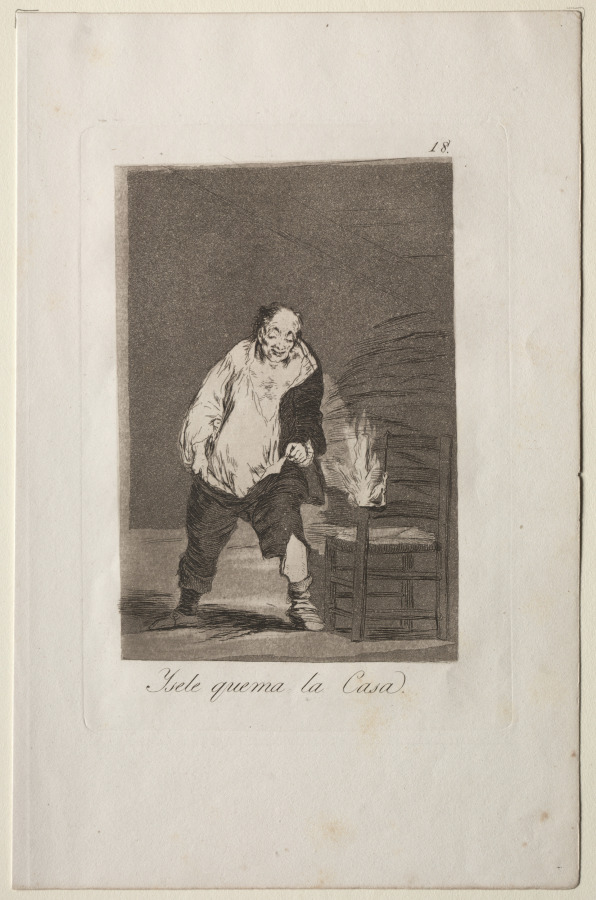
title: And His House is on Fire, Plate 18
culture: Spain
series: Los Caprichos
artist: Francisco de Goya (Spanish, 1746–1828)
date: 1799 (printed c. 1855)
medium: etching and aquatint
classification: Print